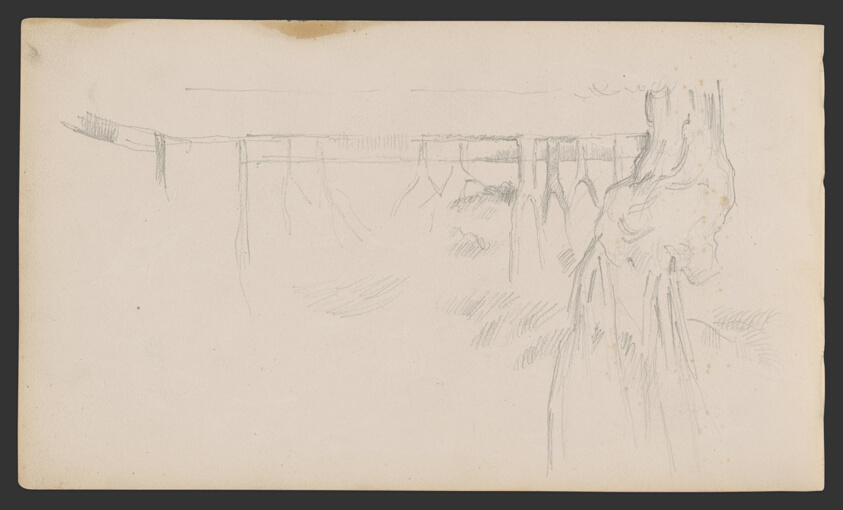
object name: Drawing and Watercolor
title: Sketchbook No. 2 (L'Estaque)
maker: Paul Cézanne; French, 1839-1906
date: 1875–86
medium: Graphite and pen and ink drawings on paper, bound into a book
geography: France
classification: sketchbook; graphite; prints and drawing; paper